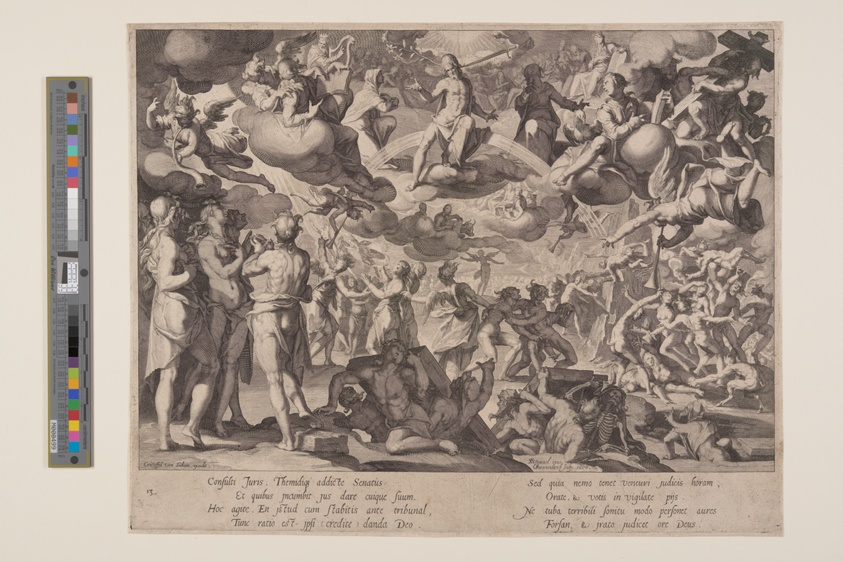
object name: Print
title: Last Judgement, plate 13 from Thrones of Justice (Thronus Iustitiae)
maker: Willem van Swanenburgh (Dutch, 1580–1612); after Joachim Wtewael (Dutch, 1566–1638)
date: 1606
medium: Engraving on ivory laid paper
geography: Netherlands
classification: print; paper; prints and drawing; engraving